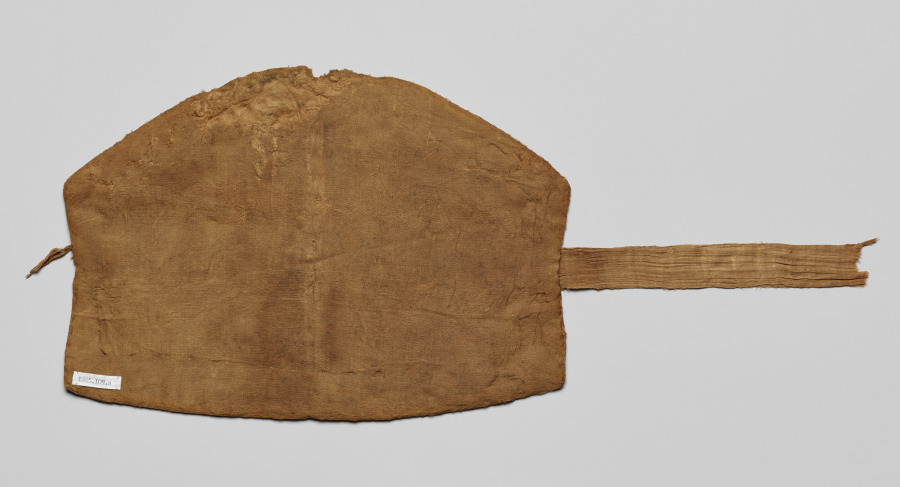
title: Headpiece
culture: China, Liao dynasty (907-1125)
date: 907–1125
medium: embroidery, silk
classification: Embroidery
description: Pair of Headpieces Embroidery; silk Liao Dynasty (907-1125) The Cleveland Museum of Art, Gift of Lisbet Holmes 1995.109.a and 1995.109.b (Cat. no. 52) These headpieces are embroidered with butterflies, birds, animals, flowers, leaves, and delicate vine scrolls. In general, the design is related to the theme of the lotus pond, best known from Liao tomb paintings. Paired ducks or geese swimming in water and looking in opposite directions seem to have become popular in the north of China before spreading further south and to Central Asia. On the other hand, recumbent animals looking back are a Central Asian image that migrated to northern China. Headpieces of this shape, intersected by two bands and secured by ties, have a long history in northern China. A gold replica was found in a tomb dating as early as ad 500-550.